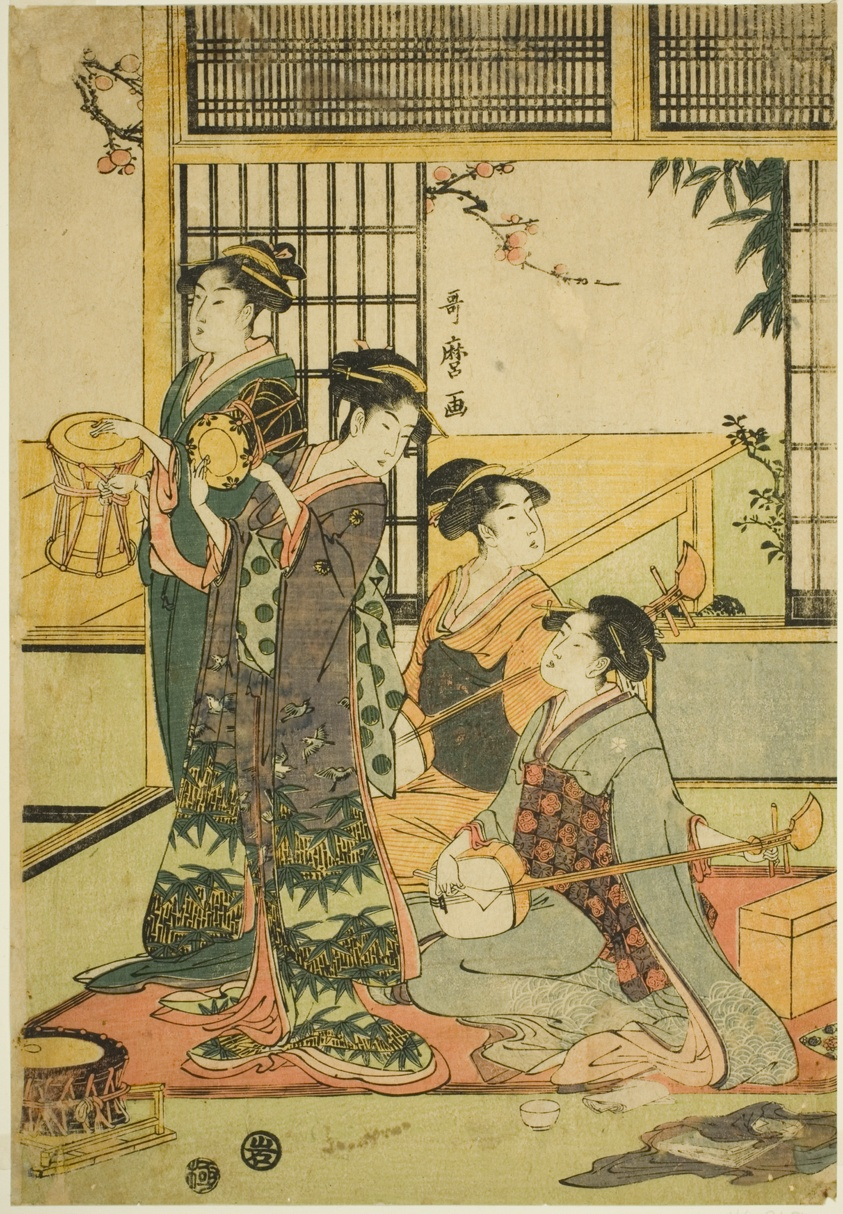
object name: Print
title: Drums and Shamisen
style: Japanese (culture or style)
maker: Kitagawa Utamaro 喜多川 歌麿; Japanese, 1753 (?)-1806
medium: Color woodblock print; aiban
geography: Japan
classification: woodblock print; print; asian art